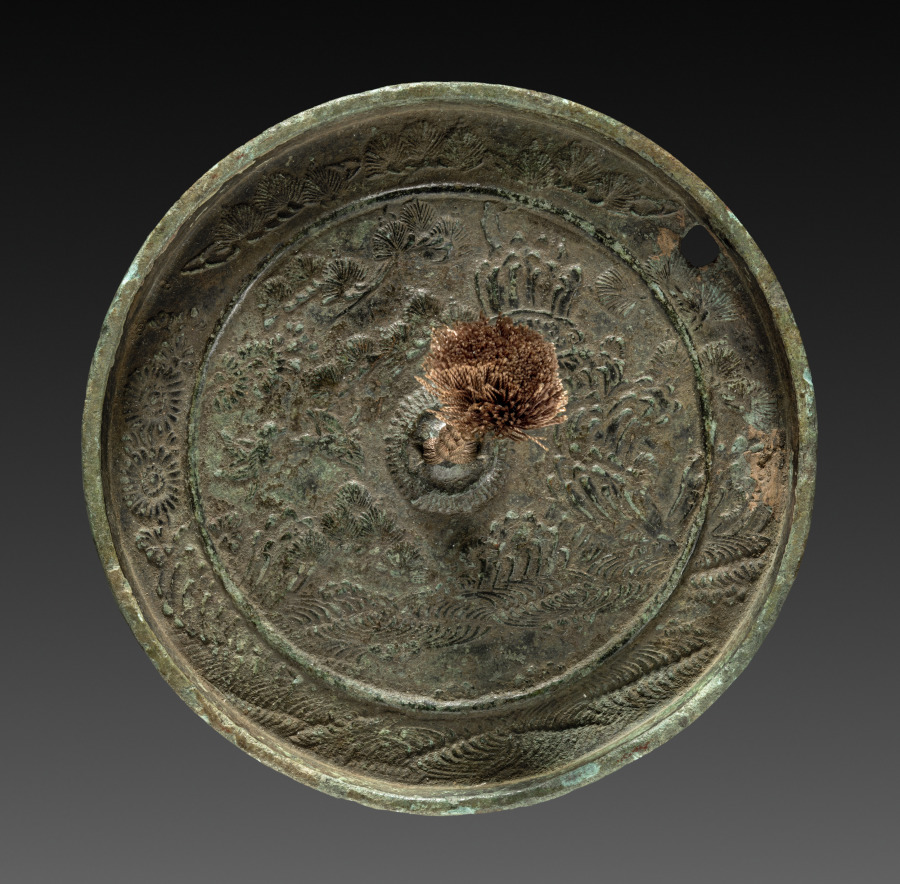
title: Mirror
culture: Japan, Kamakura period (1185–1333)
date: 1185–1333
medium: bronze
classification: Metalwork